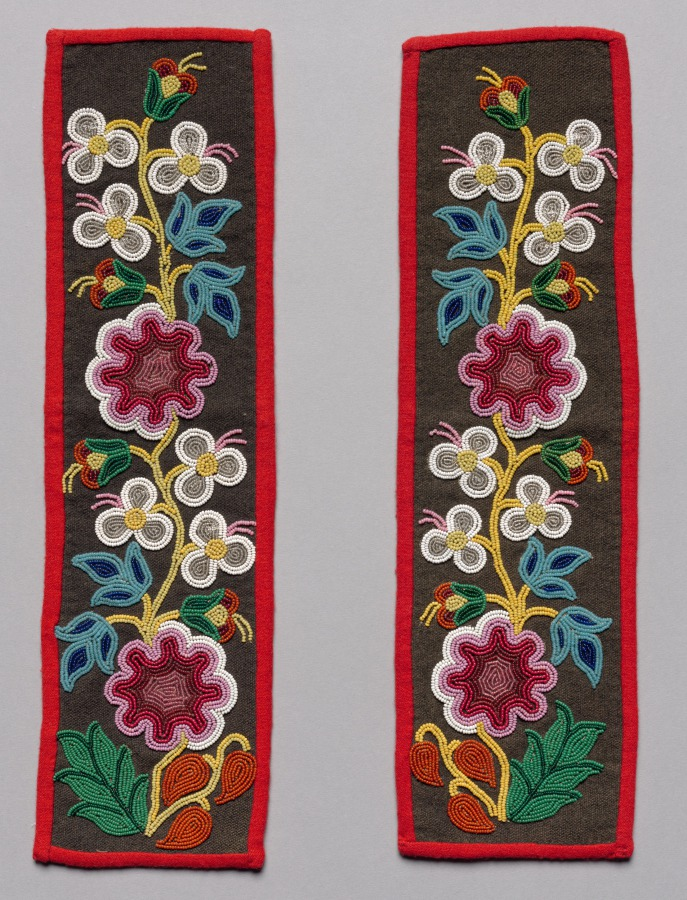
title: Two Beaded Panels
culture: Northeast Woodlands, Great Lakes Region, Anishinaabe (Ojibwe) or Nehiyawak (Cree) People?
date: late 1800s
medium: glass beads on wool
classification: Textile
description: In the 1800s, native peoples began to use European fabrics to fashion fine formal garments; they favored sturdy cloth, such as velvet and wool broadcloth, which provided support for heavy decorative beadwork that was added by hand. Often the fabric was a dark color, providing dramatic contrast for the multicolored beads. Rather than encrusting the entire garment, beadwork was confined to cuffs, “epaulettes,” bib-like plackets and yokes, rectangular panels sewn to leggings, shirts, and dresses, and the like.